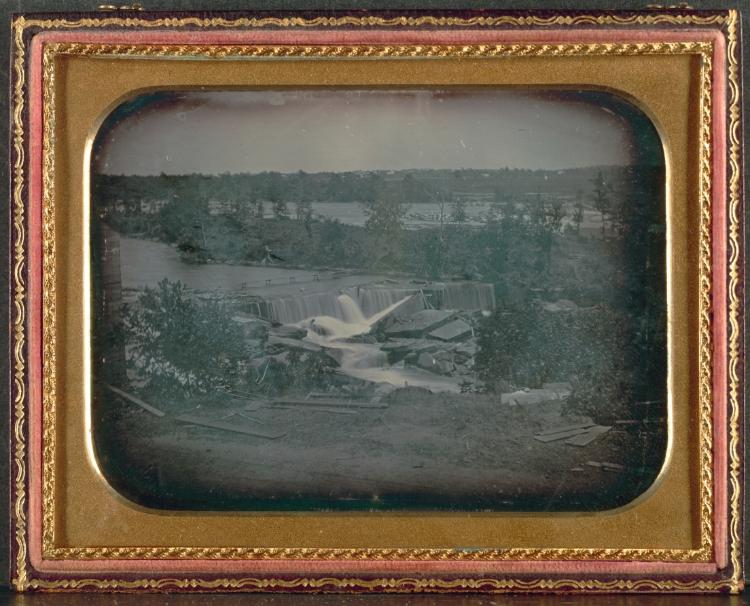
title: St. Anthony Falls from Across the River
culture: America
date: c. 1853–54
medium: daguerreotype, half-plate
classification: Photograph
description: In this image of St. Anthony Falls, the unidentified daguerreotypist made an "instantaneous view" of a remarkable natural wonder, rendering its specific geological formation with exacting clarity. Above a narrow channel where the Mississippi River runs between steep bluffs in Minneapolis, Minnesota, the falls churns away at the bedrock over which it descends. Named by Father Louis Hennepin during his travels in 1680, it is the only significant waterfall on the entire Mississippi River. The specific motivations of the photographer remain unknown. He or she may have wished the photograph to be scientific and documentary, a valuable visual aid for an artist, or just a reminder to a curious resident. No doubt, this daguerreotype was a rare image of the environment's unspoiled condition before the mid 1850s, when demand for an inexpensive energy source irreparably changed this area from a natural to industrial landscape.